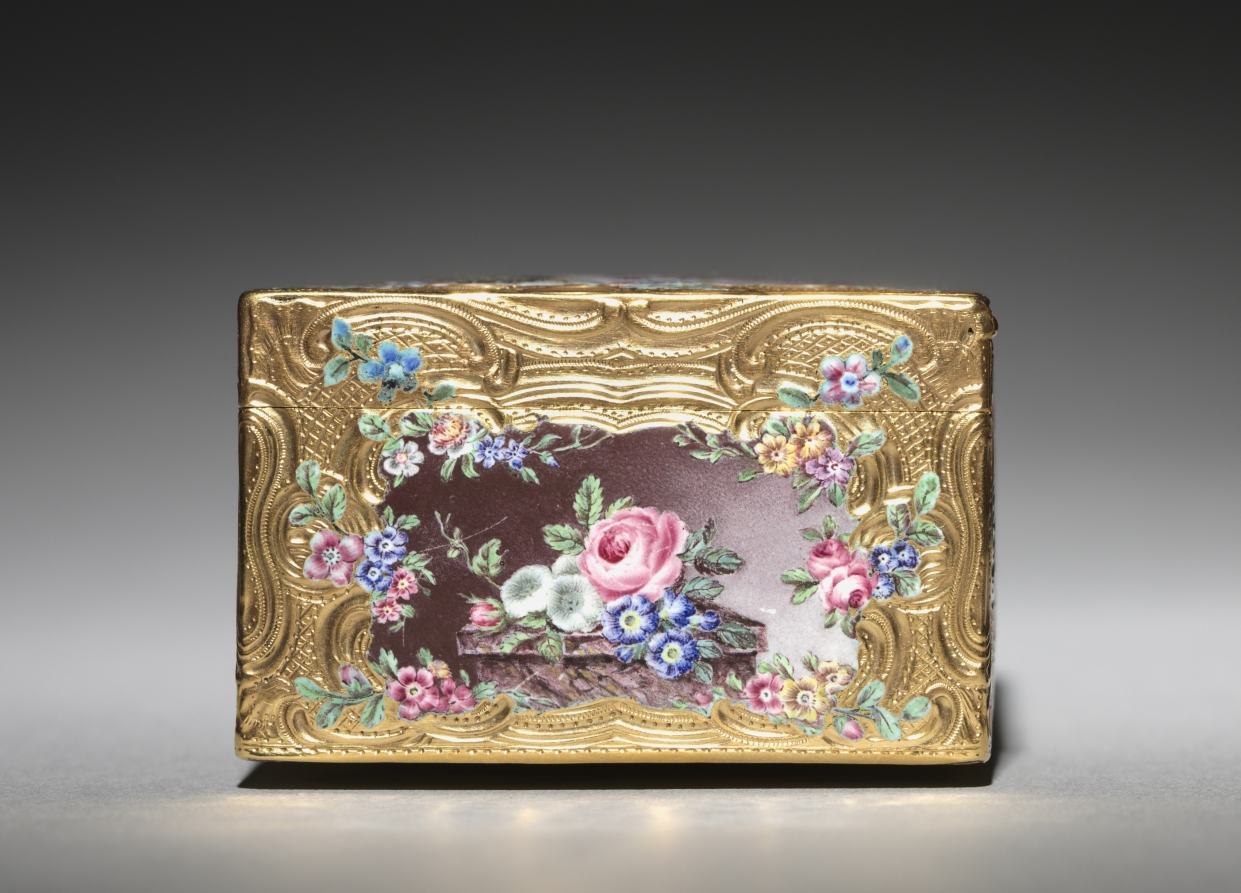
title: Snuff Box (Tabatière)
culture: France, 18th century (style of Louis XV)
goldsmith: Francois Guillaume Tiron (French)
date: 1756–57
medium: gold and enamel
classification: Miscellaneous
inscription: [Maker's mark of Francois-Guillaume Tiron, master goldsmith in 1747, inside cover; left wall]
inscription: [Warden's mark for Paris, 1756-1757, inside cover]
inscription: [Charge mark of Julien Berthe, Paris, 1750-1756, inside cover; left wall]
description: The miniature paintings that decorated snuff boxes were depicted in intricate detail requiring complex technical skill. This box’s miniatures are painted with enamel en plein, meaning the enamel has been applied directly to the metal of the box. A different enameling technique, basse-taille, is used to depict the doves and floral borders. Here, the gold has been chiseled away and filled with translucent enamel in order to produce a three-dimensional effect.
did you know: In the mid-1700s François-Guillaume Tiron worked alongside his brother, Jean-Marie Tiron, one of the most celebrated makers of gold boxes of the 18th century.